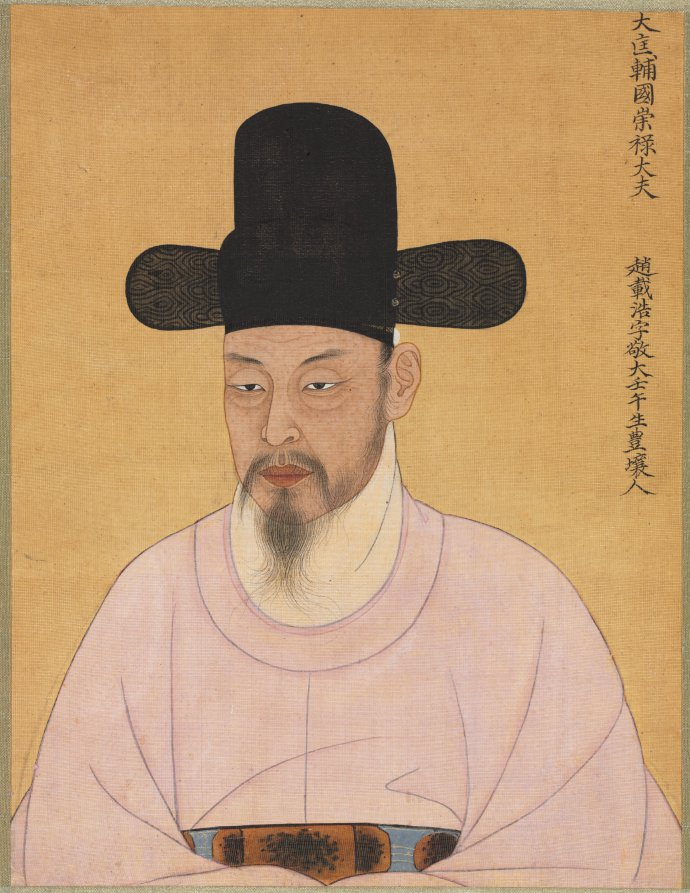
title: Cho Jae-ho from Punhyang Cho Family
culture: Korea, Joseon dynasty (1392–1910)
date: 1800s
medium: album painting, ink and color on silk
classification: Painting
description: These two portraits are of members of the Cho family, which originated from the area of Pungyang. Cho Jae-ho (1702-1762) on the left is the cousin of Cho Hyun-myeong on the right. Both were High State Councilors, called yeong-uijeong, and the Cho family ordered these two portraits as a family honor. Korean portraits were copied for sharing at each family Confucian ritual; similar portraits are still in the collection of the Cho family in Korea.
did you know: These two men belonged to the Pungyang Cho Clan, one of the most important political power houses in 18th-century Korea.